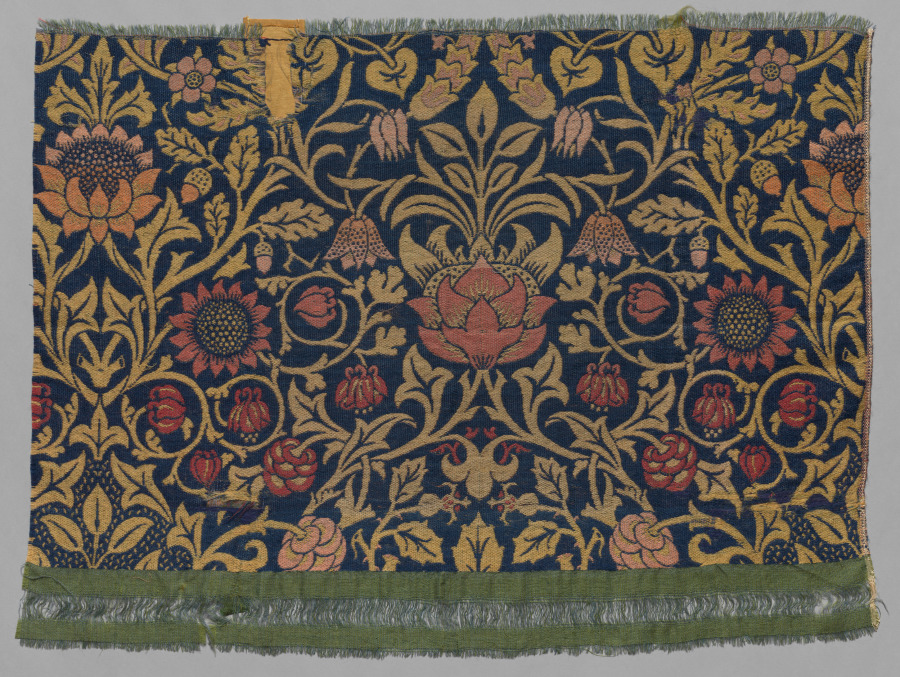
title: Violet and Columbine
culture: England, Surrey, Merton Abbey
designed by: William Morris (British, 1834–1896)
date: 1883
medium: Wool and mohair: jacquard loom woven weft-faced twill, double cloth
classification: Textile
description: Morris envisioned textiles such as Violet and Columbine hanging in heavy folds, the rich colors and flowing pattern suggesting a garden wall. He strongly preferred experimenting with natural dyes instead of using the garish chemical ones that had become standard in industrialized England. Even though organic dyes were expensive and scarce, and required dyers to revive old methods, they were less likely to fade in the light or during washing, and they were capable of producing more subtle tonal effects. A sense of the process of hand-weaving can be understood by looking at the back of this textile. The warp (up and down) threads are light blue and green—visible at the bottom. The textile was woven in long lengths that could be cut at these passages of loose thread. The weft (side to side) threads in several colors, including red, pink, yellow, and blue, are more visible from the back than the front, where they disappear into the pattern.